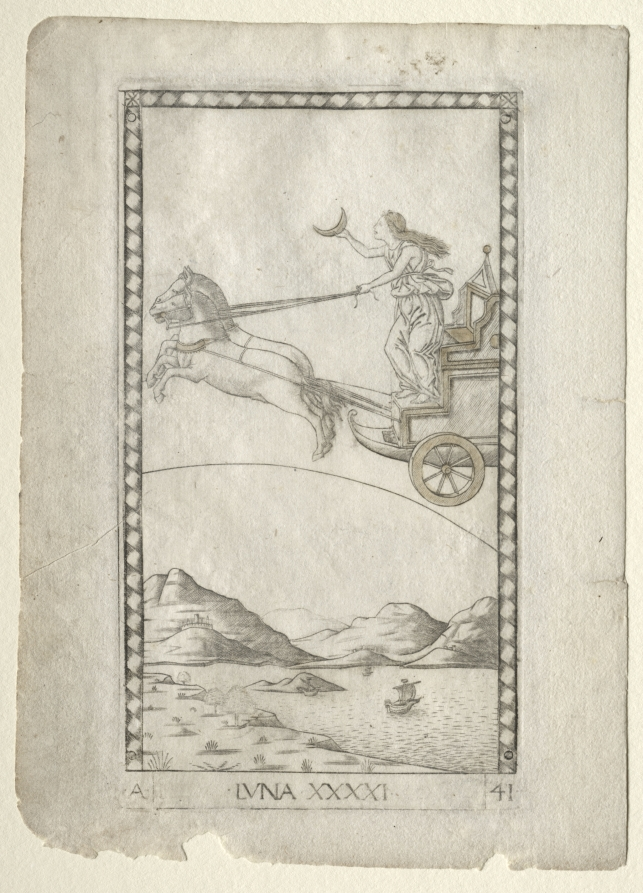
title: Luna (from the Tarocchi, series A: Firmaments of the Universe, #41)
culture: Italy, Ferrara, 15th century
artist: Master of the E-Series Tarocchi (Italian, active 1460s)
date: before 1467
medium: engraving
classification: Print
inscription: Lettered below the image of Luna (Moon): ·A· / ·LUNA·XXXXI· / ·41·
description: This engraving is part of the Tarocchi group marked with the letter “A”, and named Firmaments of the Universe. This series comprises the seven planets from the classical astronomy (Moon, Mercury, Venus, Sun, Mars, Jupiter, Saturn) and the three celestial spheres that separate them from the Supreme Entity (Prima Causa) from which everything was originated. Here, Luna (Moon) is personified as a female figure steering a chariot drawn by two horses in the sky and above an imaginary landscape. With her right hand, she holds up a crescent moon.